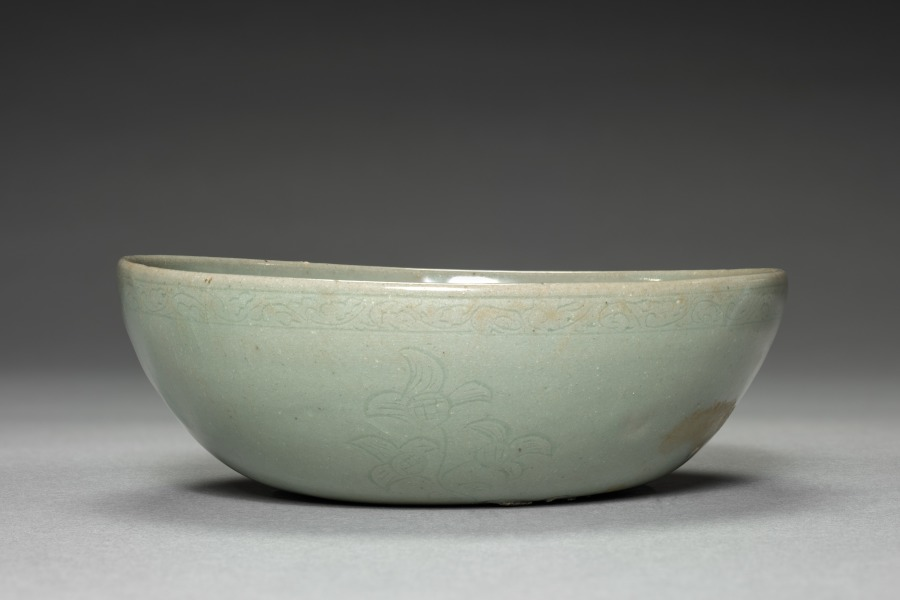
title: Dish with Incised Floral Design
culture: Korea, Goryeo dynasty (918–1392)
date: 1100s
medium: glazed porcelain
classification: Ceramic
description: Celadon wares used for everyday such as this dish were among the most common burial objects in tombs during the Goryeo period (918–1392). Furnishing tombs with an elaborate assemblage of objects was believed to honor and comfort the newly dead. Generally, Goryeo tombs were left untouched until the late 1800s. During the colonial period (1910–45), however, Japanese archaeologists competitively excavated the tombs located in Kaeseong, the former capital of the Goryeo period, and these wares soon became available for Japanese and Western collectors.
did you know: The translucent greenish and bluish glaze of Goryeo celadons, shown in this vase, is the result of distinctive small and long Korean kilns, which maintained a low oxygen saturation with a high level of carbon dioxide.